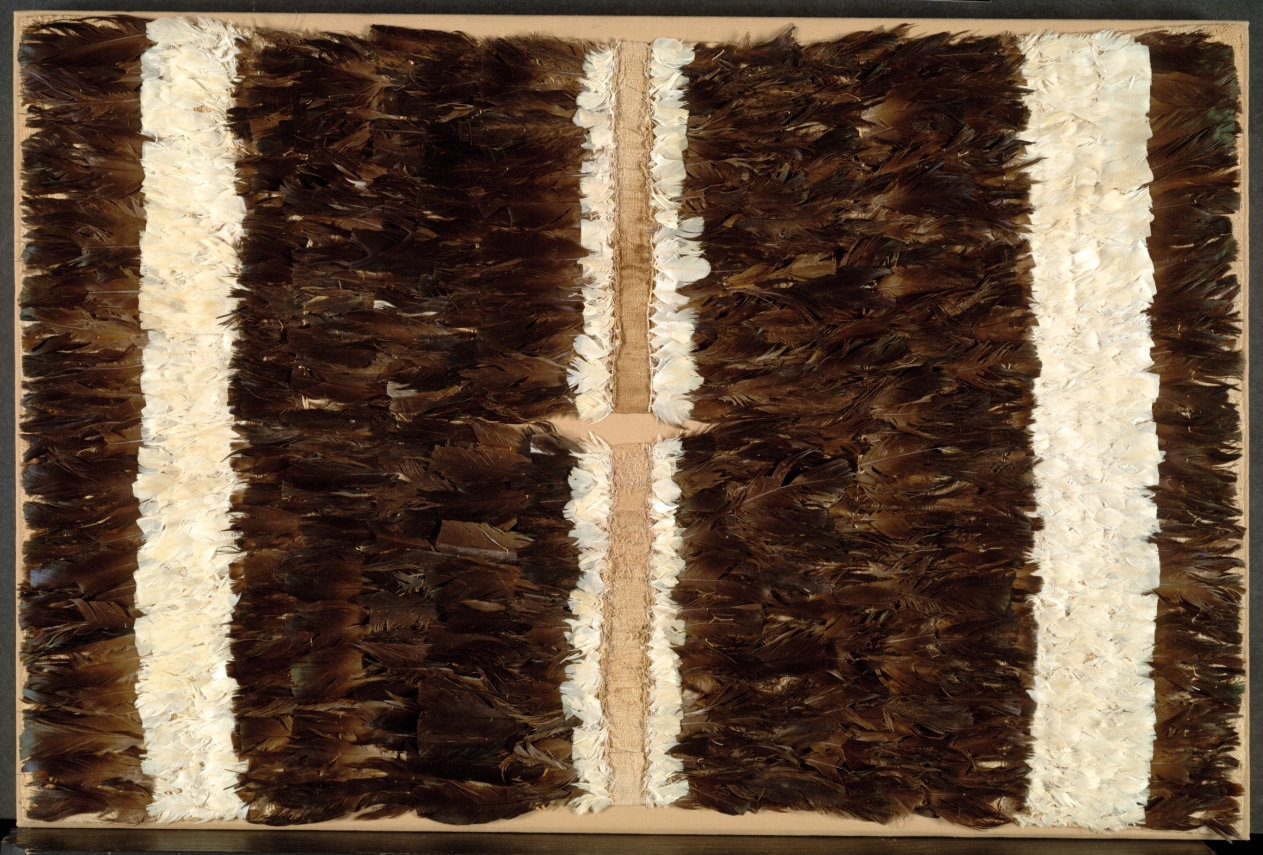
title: Feathered Tabard or Tunic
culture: Andes, 7th-15th century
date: 600–1500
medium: black and white feathers sewn to cotton tabby ground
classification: Textile